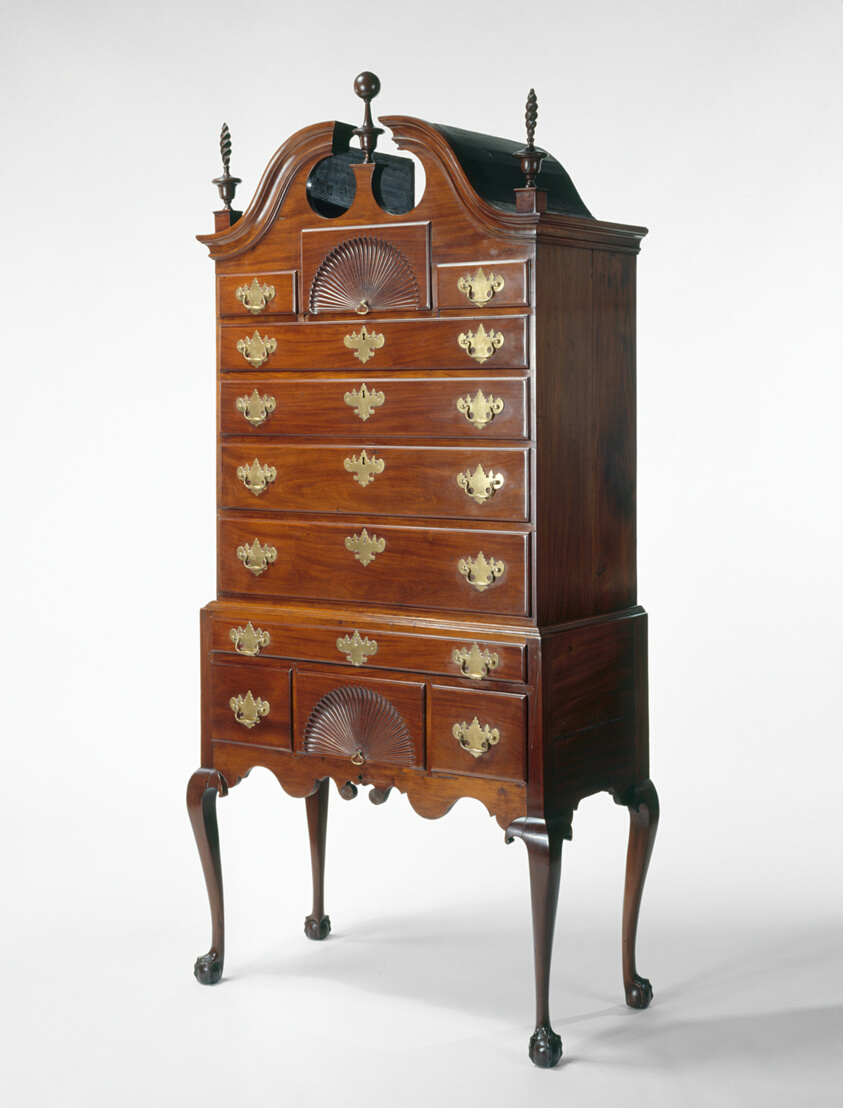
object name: Furniture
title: High Chest of Drawers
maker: Artist unknown (American, 18th century); Salem, Massachusetts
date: 1760–75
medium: Mahogany and white pine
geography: Salem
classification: case furniture; furniture; american decorative arts; american arts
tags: furniture